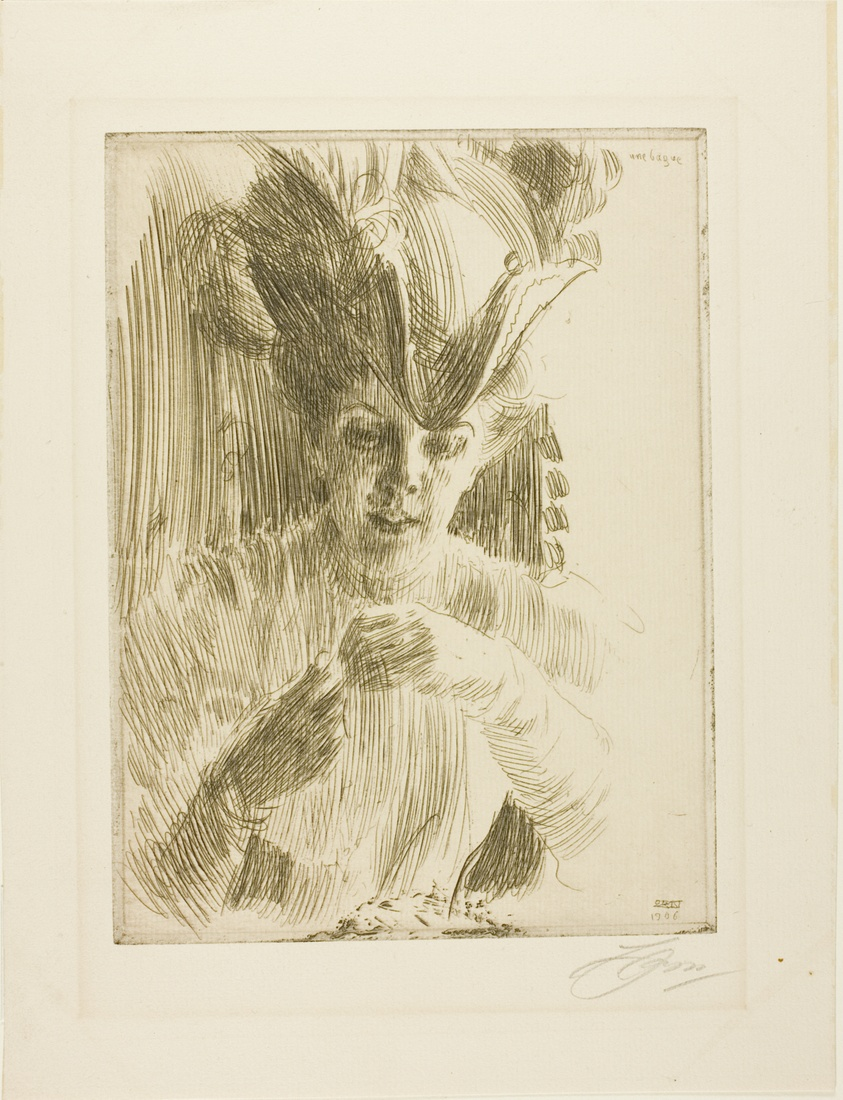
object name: Print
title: A Ring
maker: Anders Zorn (Swedish, 1860-1920)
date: 1906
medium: Etching on ivory laid paper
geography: Sweden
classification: etching; print; prints and drawing